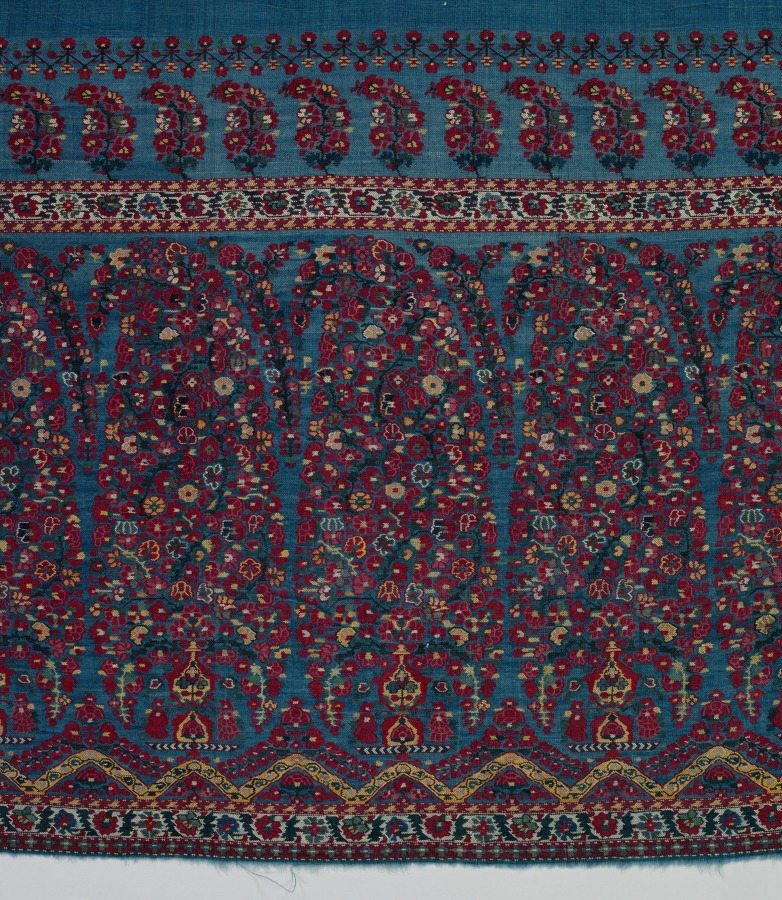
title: Shawl with boteh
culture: India, Kashmir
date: 1820–1830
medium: 2/2 twill tapestry weave, double interlocked: wool, possibly pashmina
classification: Textile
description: Thousands of luxurious shawls imported from Kashmir, India, were status symbols that European-manufactured imitations could not equal. Those woven in Paisley, Scotland, gave rise to the popular term paisley. Their representation in portraits records the evolution of shawl fashions, which helps to date surviving examples. The coveted quality of Kashmir shawls was achieved with luxurious fine goat hair woven in twill tapestry to form small colorful blossoms. Such shawls are lightweight, supple, and warm. A plethora of blossoms arranged in small vases on stands form the large paisley or boteh motifs, while smaller versions enliven the sides of the field. Such floral displays evolved from blossoming plants possibly in 16th-century India.